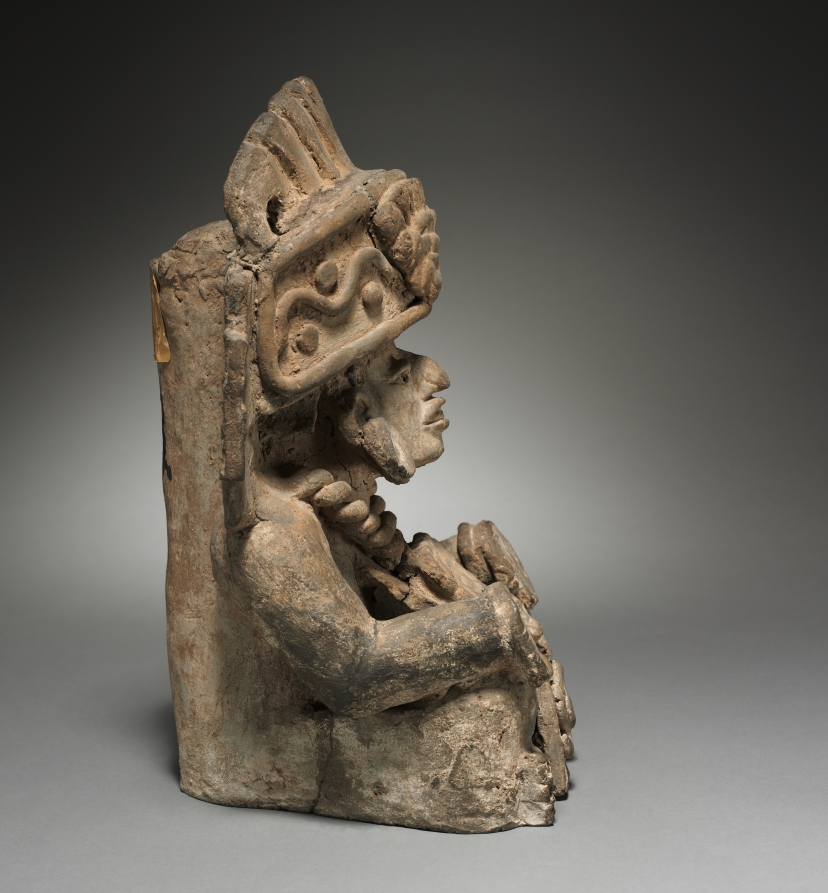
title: Funerary Urn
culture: Mexico, Oaxaca, 5th-6th Century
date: 400s-500s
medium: earthenware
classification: Sculpture